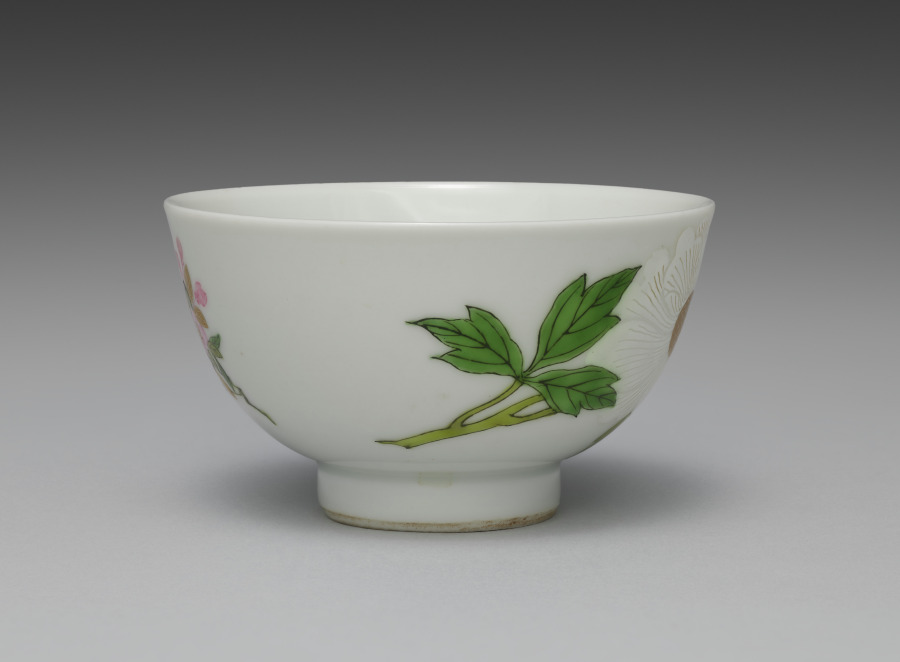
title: Teabowl from Teabowls with Peony and Crabapple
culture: Japan, Meiji period (1868–1912)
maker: Seifū Yohei III (Japanese, 1851–1914)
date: 1893–1914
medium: One from a set of five teabowls; porcelain with underglaze and overglaze color enamels and gold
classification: Ceramic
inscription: 清風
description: Overglaze color enamels are generally called iro-e (literally “color picture”) in the terminology customarily used for porcelain decoration of the Edo period. This set of teabowls is a fine example of Yohei III’s skilled use of the technique, which is identified on this set’s box lid with the alternate phrasing “porcelain with color painting” (jisaiga). Distinct from the way overglaze colors were used in Kakiemon ware from Arita, his designs and applications show a consciousness of porcelain decoration of the Qing dynasty. Here, he combines Chinese models with a sensibility taken from Kyoto ware precedents, including painting with powdered gold (kinrande). The colors used in the bowls are as follows: blue, black, gold, white, light green, green, and pink. The blue appears only inside the footring, as a double band of underglaze color. The black iron, used for stems and leaf veins, is painted over the glaze. The gold, also painted over the glaze, is used for leaves and the centers of flowers, for solid, glossy lines defining detail, or as a semimatte ground. The white of the peony flower is built up to a low relief over the glaze. Yohei has incised lines of varying widths into the pigment, carving away to the bowl’s surface, to differentiate individual petals and their rippled shapes. The light and dark greens, as well as the pink, are painted over the glaze. Of note is how Yohei has first used thinly applied lines of light green to draw the plum branch before applying the opaque iron black. For the plum buds and flowers, he has used a diluted pink with an opaque pink for outline, both over the glaze. In his later works, Yohei used pink both over and under the glaze in a manner similar to underglaze blue, and it can be challenging in some cases to discern which technique he has used. A lidded container in a private collection has a similar design but is augmented with the inclusion of white and purple magnolia blossoms. In contemplating the original decorative program of a set, of which these teabowls may have been a part, it is worth considering that perhaps not all objects included the full range of motifs. In such cases, the composition of the individual object may be best understood within the context of the extended ensemble. Here, the delicate pink plum on one side of the bowl seems slightly unbalanced with the bold white peony on the other, but when seen with other objects with the magnolia and its additional colors and shapes, it is possible to imagine a set with a complex, balanced design across multiple pieces.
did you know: Because four is considered an unlucky number, it became customary to assemble groups of guests of five or multiples of five.